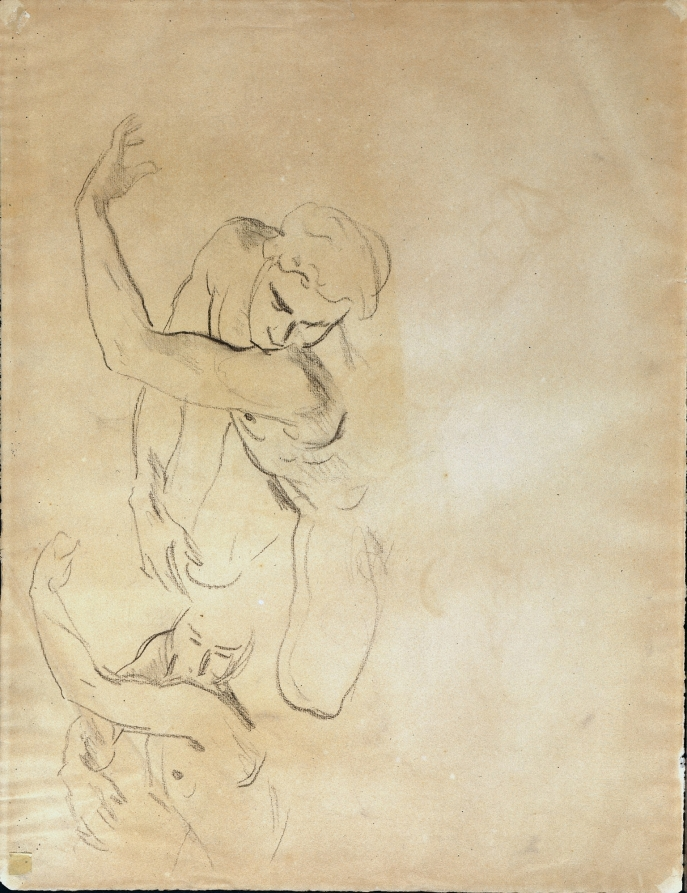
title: Studies of a Male Nude (verso)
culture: America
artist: John Singer Sargent (American, born Italy, 1856–1925)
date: 1918–19?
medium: charcoal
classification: Drawing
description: In 1919, Sargent exhibited a large painting at the Royal Academy of Art in London called Gassed. The Dressing Station at Le Bac and on the Doullers-Arras Road. The British War Memorial Committee had commissioned the work from him as a way of honoring the sacrifices of World War I. The subject was based on a scene the artist actually witnessed during his visit to battlefields in France in 1918. This drawing is a study for one of the soldiers in the painting, which now hangs in the Imperial War Museum in London.